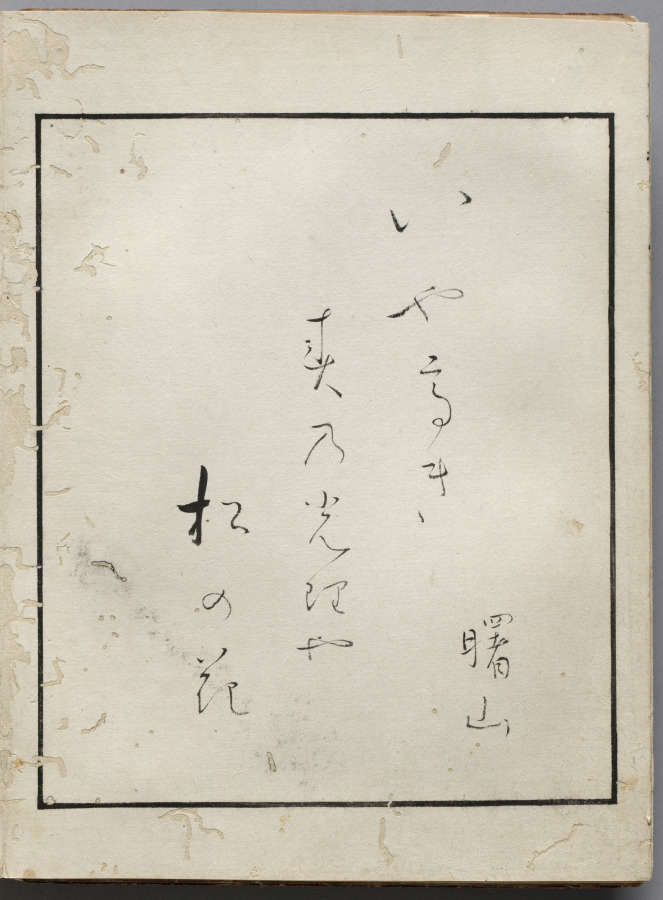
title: Double-Leaf from Album of Actor Portraits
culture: Japan, Edo period (1615–1868)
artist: Shōrakusai (Japanese)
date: c. 1790–1810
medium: double-leaf from an accordion-style album; ink on paper (right) and ink and color on silk (left)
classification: Bound Volume